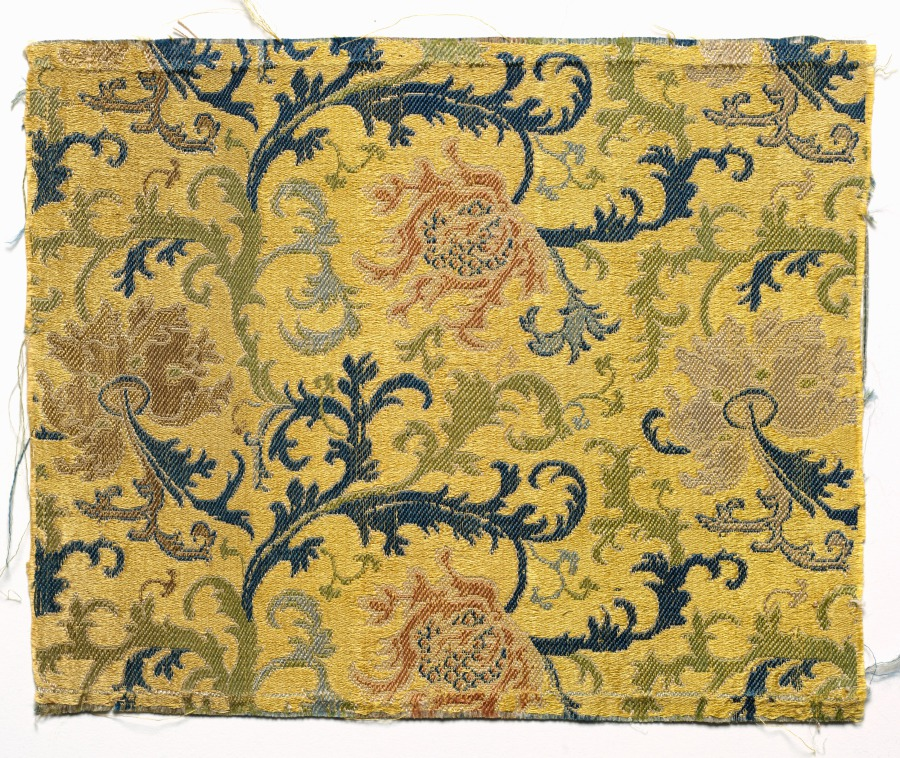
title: Fragment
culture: China, 18th century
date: 1700s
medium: satin ground; silk diasper weave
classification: Textile